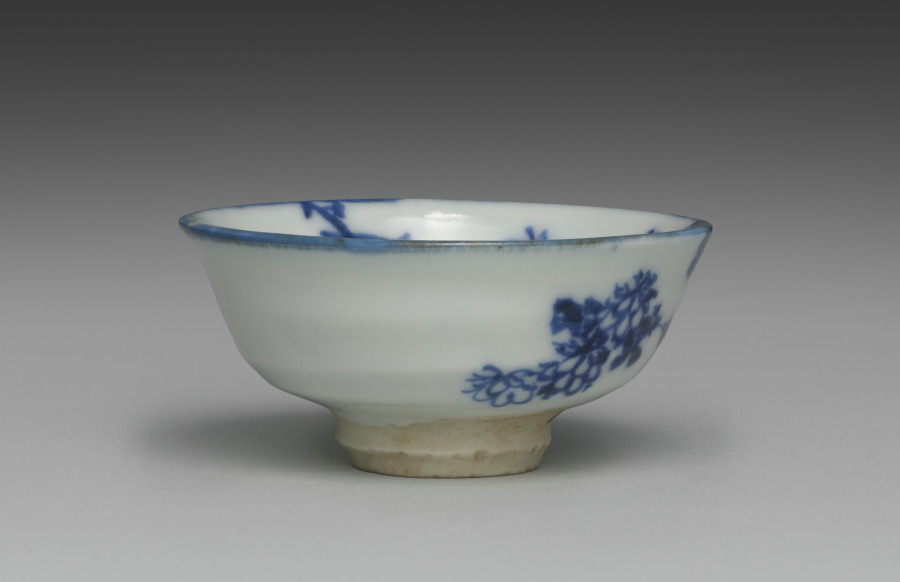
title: Sake Cup with Auspicious Plants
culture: Japan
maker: Seifū Yohei II (Japanese, 1844–1878)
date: 1861–78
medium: One of a pair of sake cups; porcelain with underglaze blue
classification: Ceramic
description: Seifū Yohei II excelled as a painter, as evidenced by his floral and landscape designs. His works were selected as the best among Kyoto ceramics shown to jurists from Europe and the US, thus paving the way for international recognition of the studio in the late 1800s.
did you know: Orchid, bamboo, chrysanthemum, and plum all appear on this cup and have associations with the four seasons.